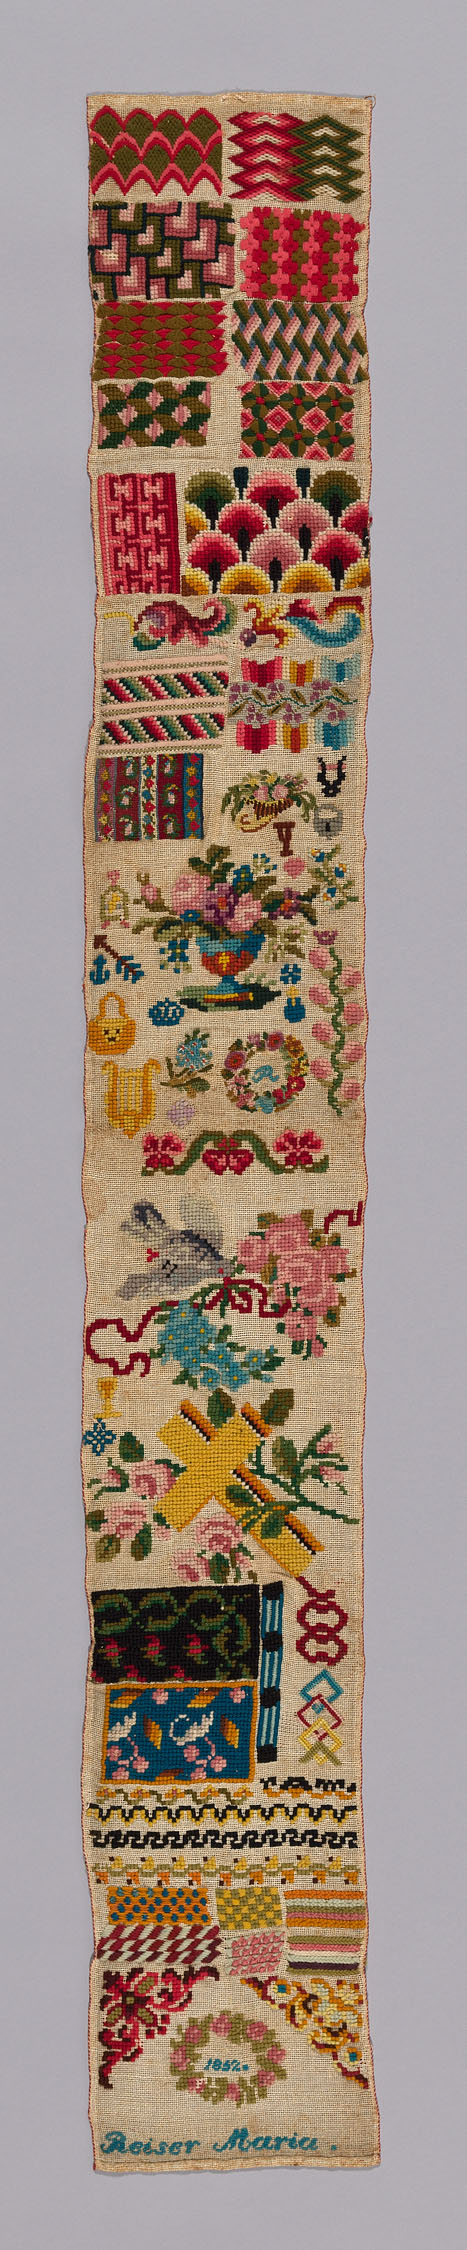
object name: Textile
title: Sampler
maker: Executed by Maria Beiser (Germany, active c. 1852); Germany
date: 1852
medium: Linen, plain weave; embroidered with wool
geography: Germany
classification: textile; needlework (visual works); sampler